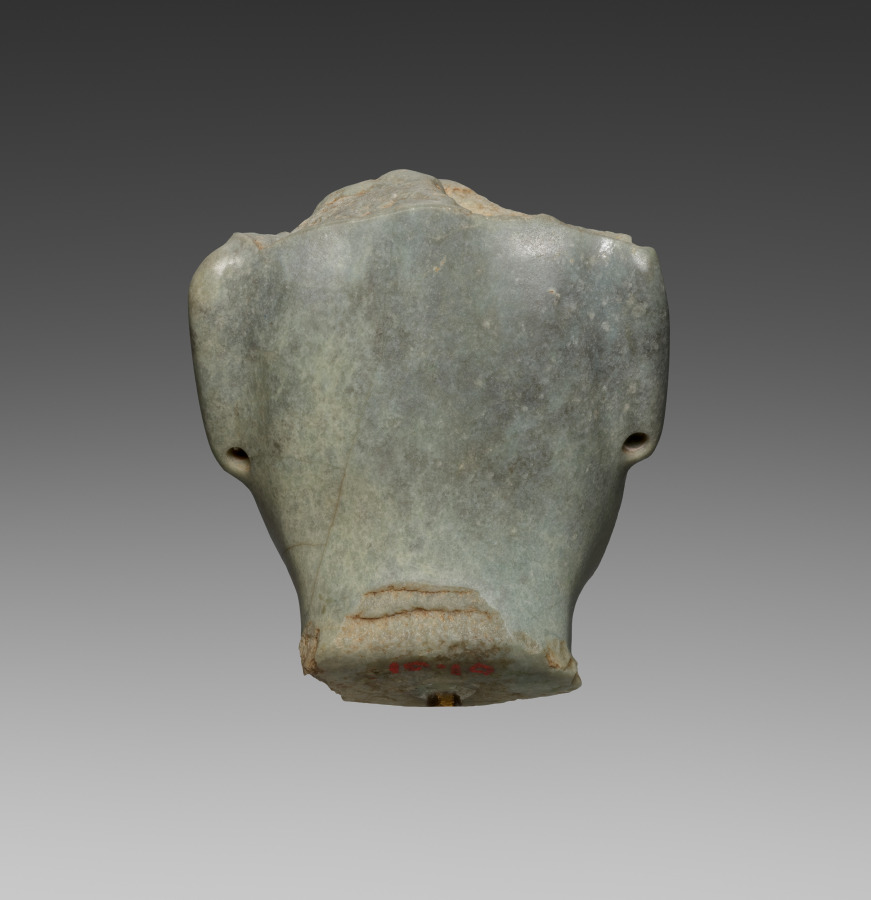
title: Head Fragment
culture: Mesoamerica, Mexico, Olmec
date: c. 900–300 BCE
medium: jadeite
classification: Jade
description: This sensual head fragment may come from a seated or standing figure like those shown nearby, though much larger. The carving is exceptionally fine, from the slight under-eye puffiness to the delineation of the fleshy lips and the teeth. The profile face of supernatural being is incised just in front of each ear, perhaps indicating that the subject had special power.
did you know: In ancient Mesoamerica, jade was more valuable than gold.